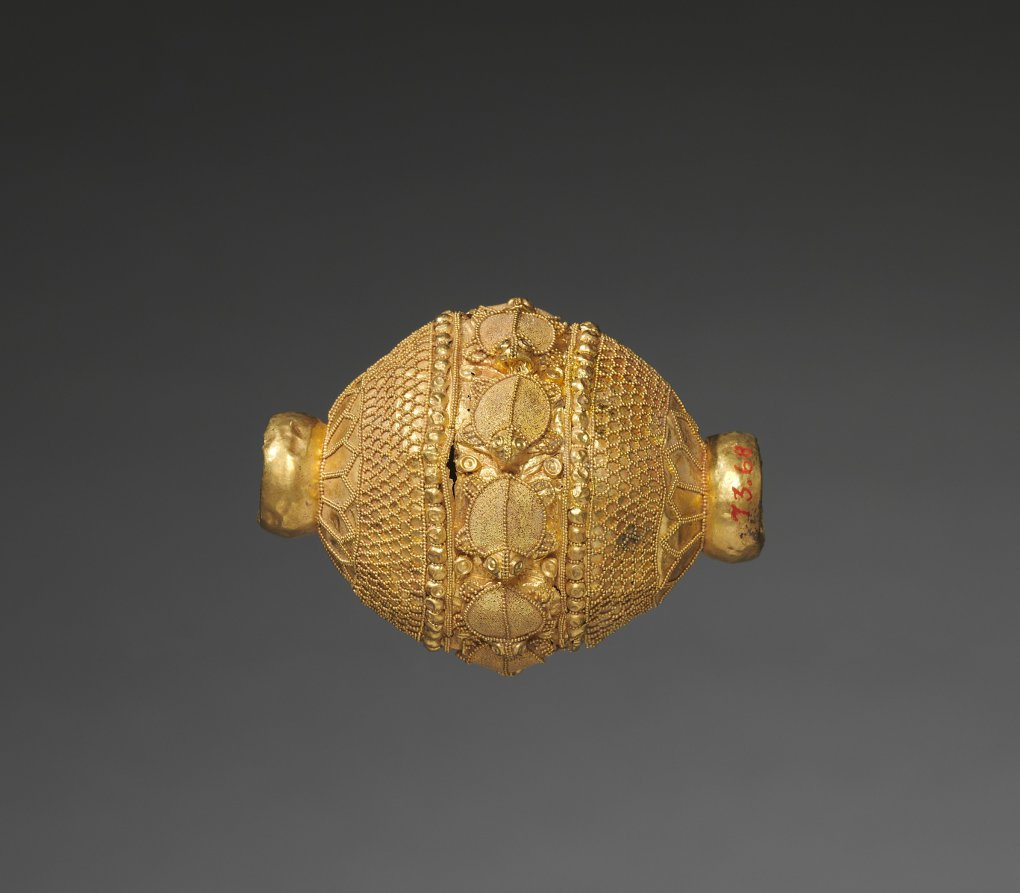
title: Necklace Bead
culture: India, Uttar Pradesh or Madhya Pradesh, Shunga period (185–78 BCE)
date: 185–72 BCE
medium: gold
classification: Jewelry